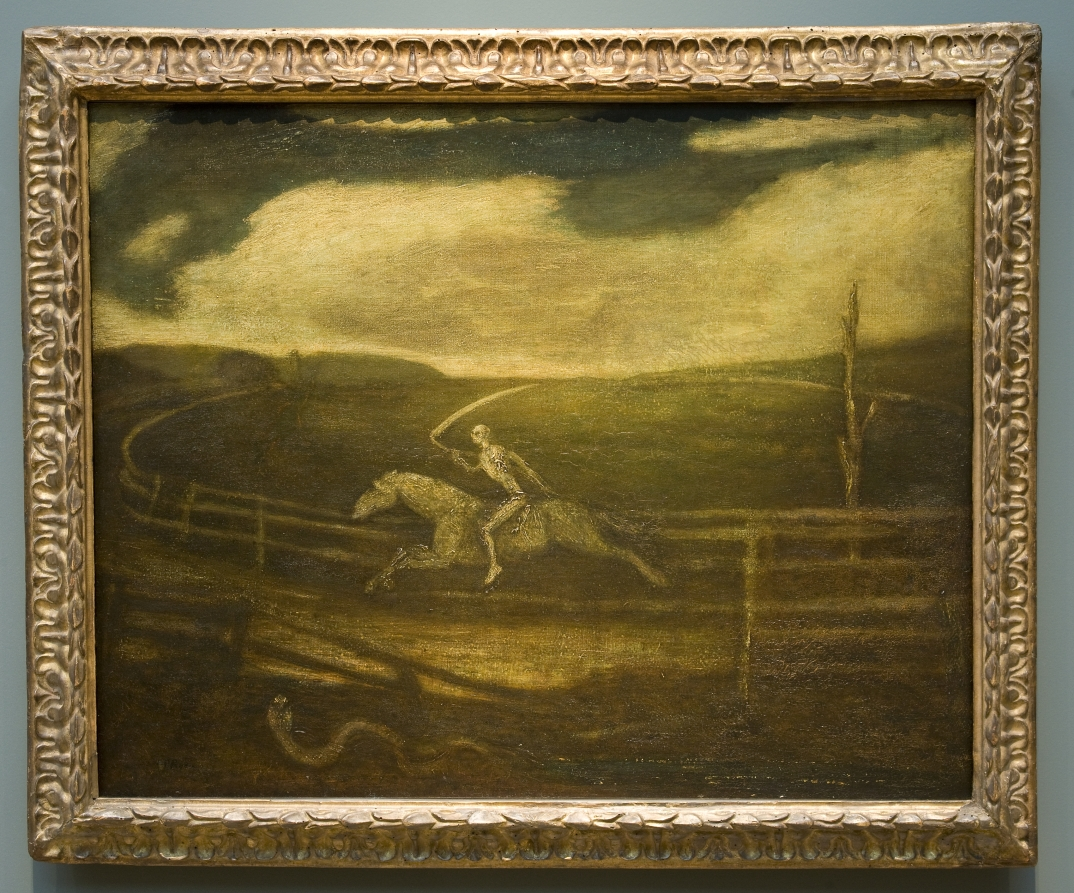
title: The Race Track (Death on a Pale Horse)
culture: America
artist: Albert Pinkham Ryder (American, 1847–1917)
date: c. 1896–1908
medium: oil on canvas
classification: Painting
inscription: Signed lower left: "A. P. Ryder"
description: Ryder’s subject was inspired by a horse race that took place in New York during 1888. One of the artist’s friends wagered $500 on the race and then died by suicide after the horse lost. Medieval symbolism infuses the composition: death appears as a skeleton on horseback holding a scythe with which he cuts down the living, while a snake—a sign of temptation and evil—slithers in the foreground. An intense man, Ryder worked on the painting for several years and was deeply reluctant to part with it.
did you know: Counterclockwise horse racing in the United States was not standardized until the 1920s.